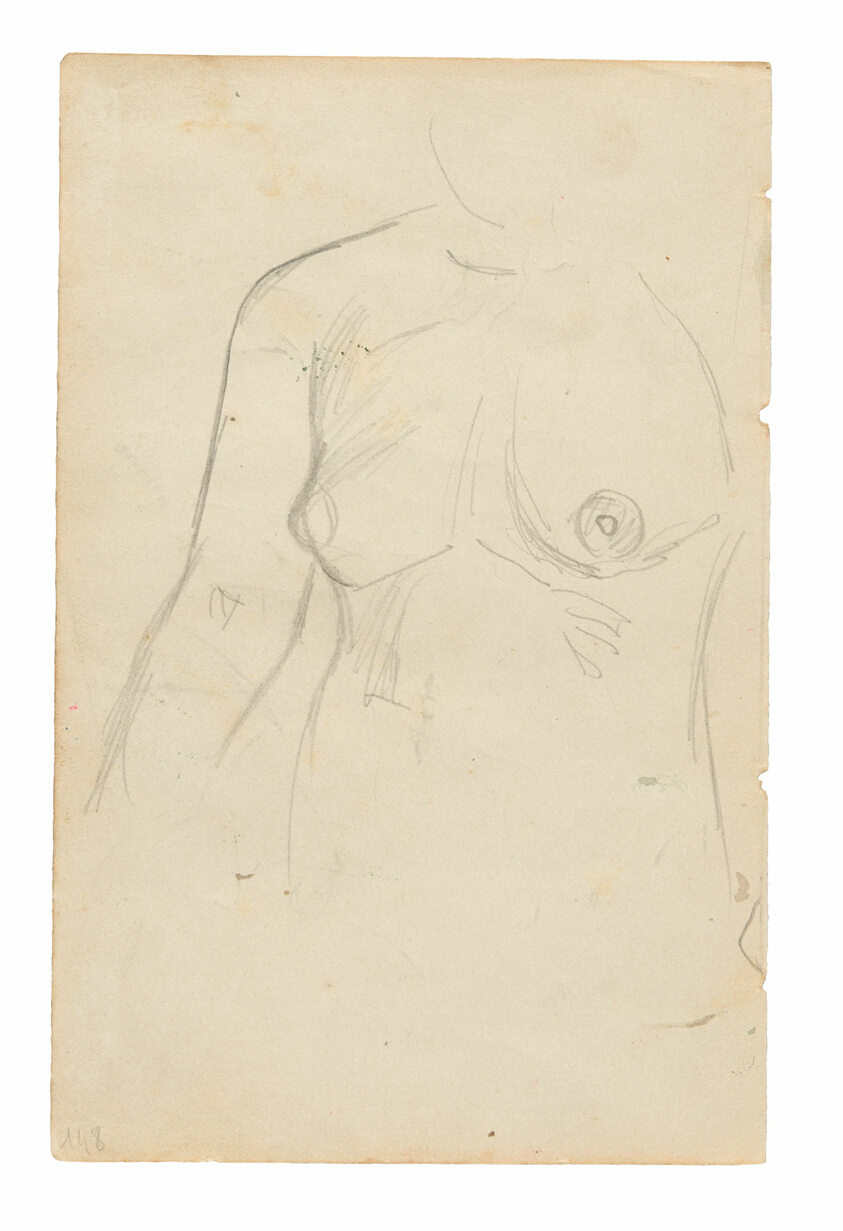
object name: Drawing and Watercolor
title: Sketches of Seated Figures and Chickens (recto), Nude Female Torso (related to the painting Te a no areois [The Seed of the Areoi]) (verso), from the Carnet de Tahiti (Tahitian sketchbook)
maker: Paul Gauguin (French, 1848-1903)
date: 1891/93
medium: Graphite (recto); graphite with traces of green watercolor offset (verso); on cream wove paper (removed from a sketchbook)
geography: France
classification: graphite; drawings (visual works); prints and drawing